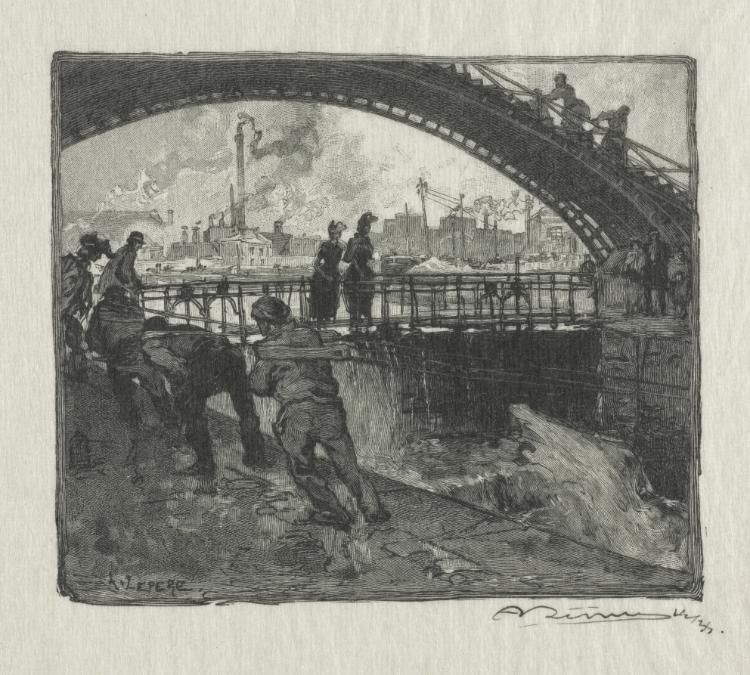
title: The Lock of the St. Martin Canal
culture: France, 19th century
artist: Auguste Louis Lepère (French, 1849–1918)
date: 1890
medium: wood engraving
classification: Print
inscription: lower right, in black ink: A Lepere 14/35